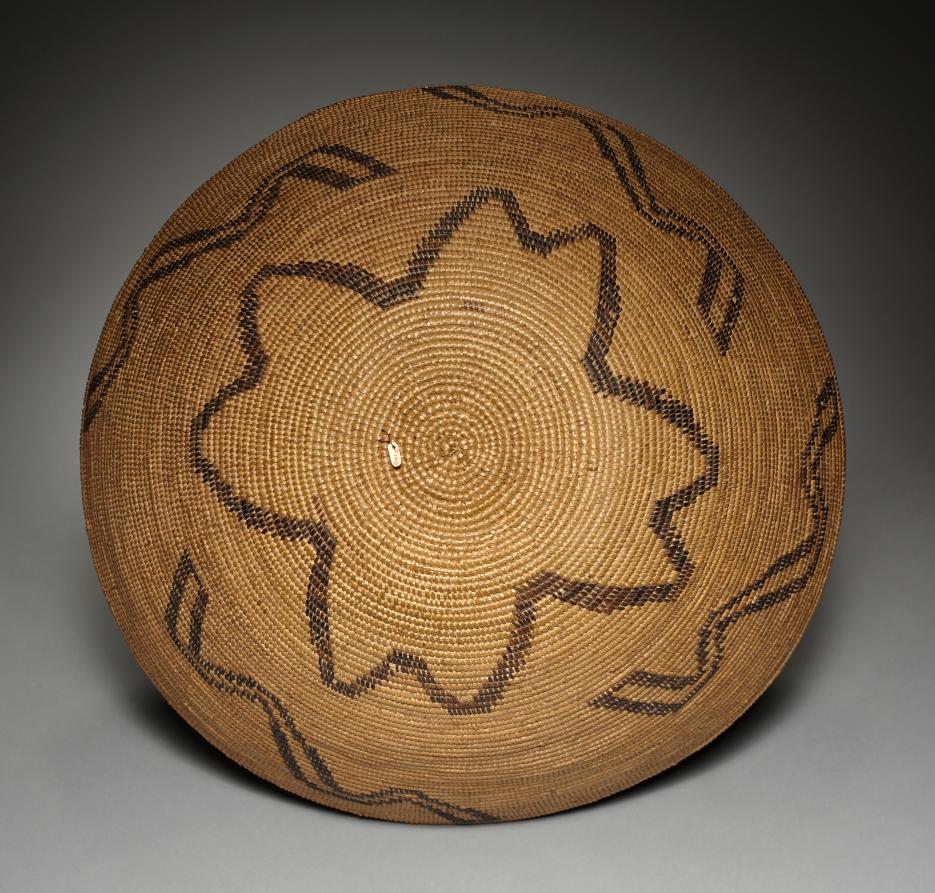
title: Food Bowl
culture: California, Southern, Gabrielino (San Gabriel, Mission or Tongva), Late 19th- Early 20th century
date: c 1875– 1925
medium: coiled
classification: Basketry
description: CMA Bulletin, December 1930